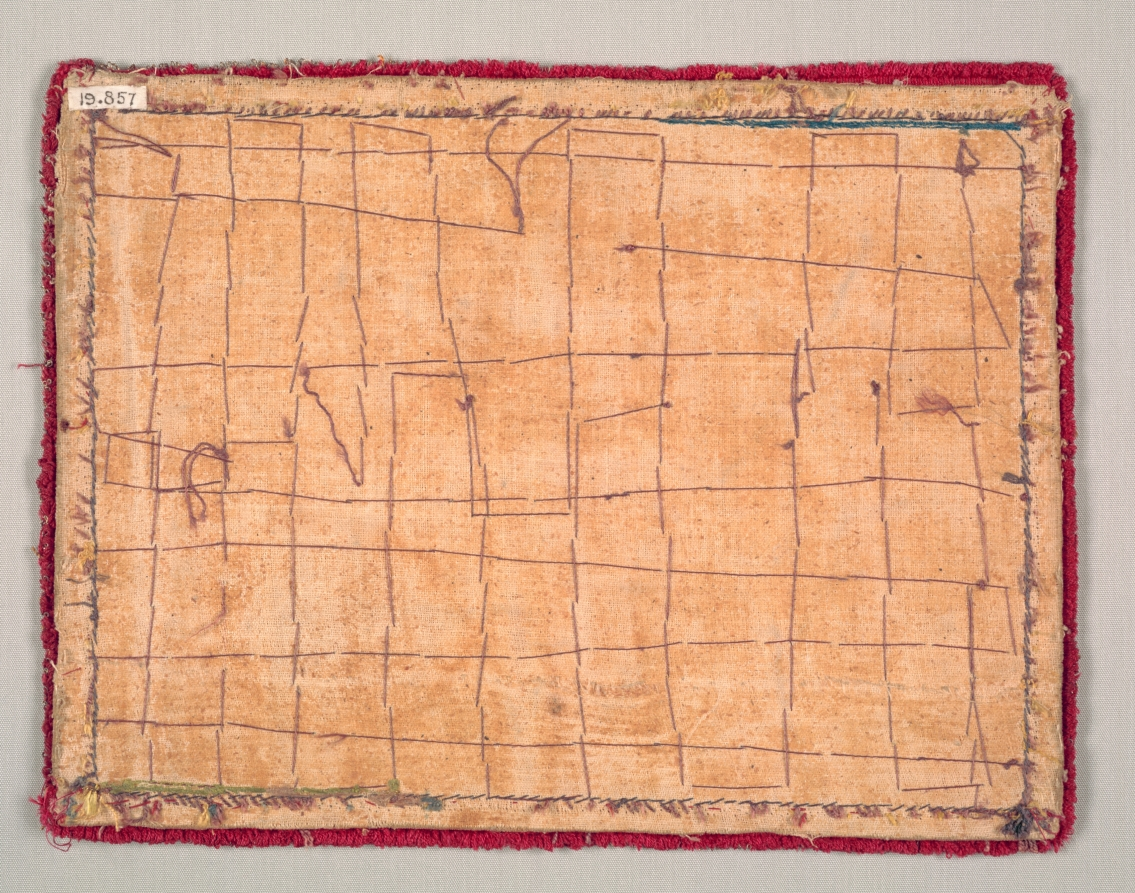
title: Apparel from a Dalmatic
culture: Italy, Florence, 16th century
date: 1500s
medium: Silk, gold thread; embroidery: or nué (shaded gold)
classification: Embroidery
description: The artist who drew this pattern created expressive facial features that a master embroiderer conveyed with silk stitches. That high level was probably achieved by an embroiderer specializing in faces, hair, and skin. The draped clothing was created by varying the density of silk thread crossing over the gold thread. Embroidered scenes in rectangular panels, known as apparel, were made with luxurious thread to decorate tunic-shaped ecclesiastical garments, or dalmatics. An apparel was placed at the ends of sleeves, as seen in a nearby example, and on the front and back above the hem.